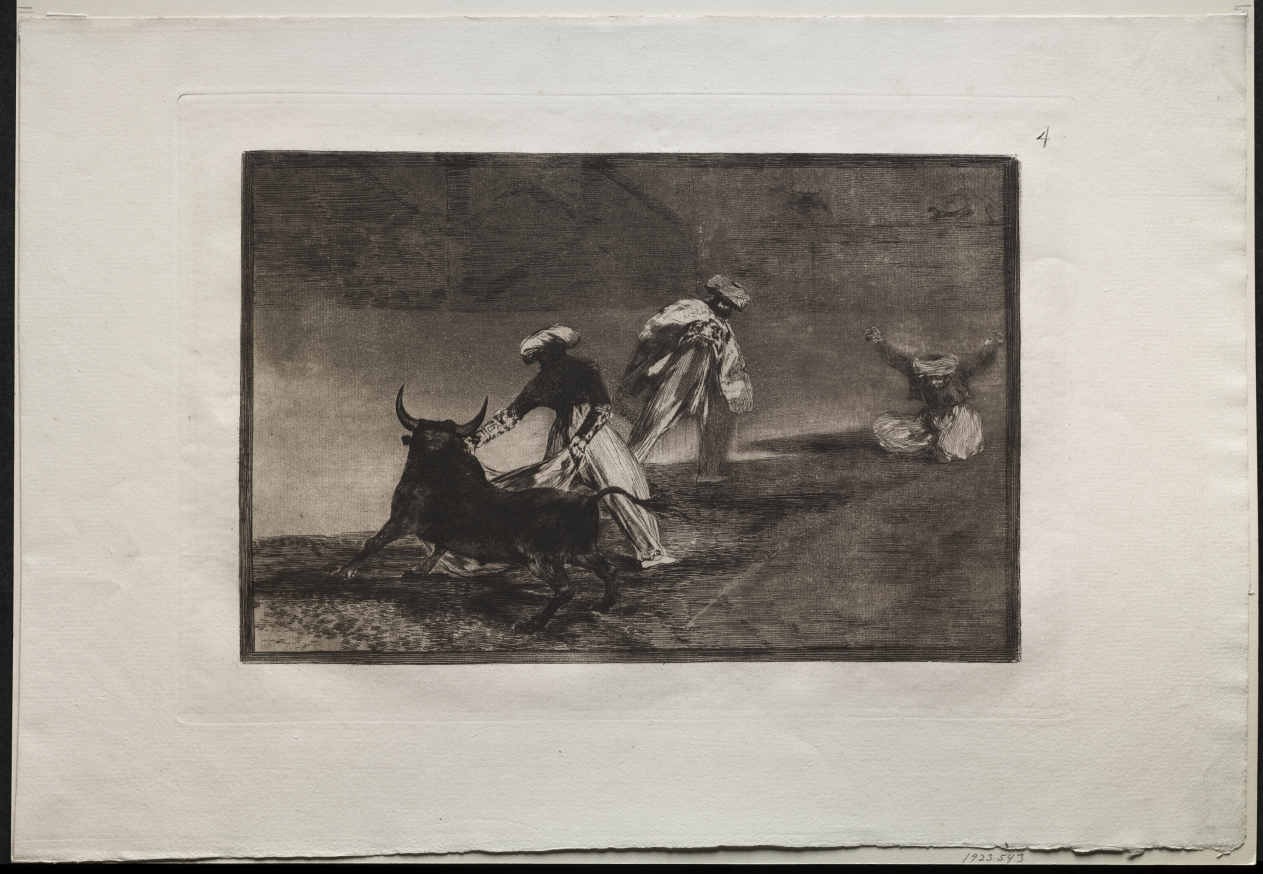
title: Bullfights: They Play Another with the Cape in an Enclosure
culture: Spain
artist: Francisco de Goya (Spanish, 1746–1828)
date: 1816, printed 1876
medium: engraving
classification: Print